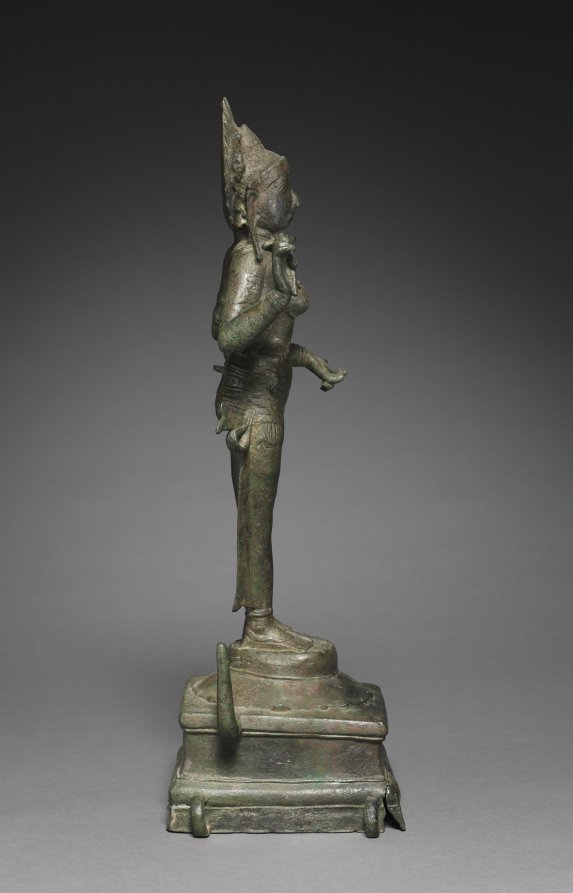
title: Kali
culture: South India, Tamil Nadu, Chola period (900-13th century)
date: 900s–1000s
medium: bronze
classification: Sculpture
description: The female aspect of Shiva, the goddess Parvati, has her own cycle of myths, and she herself emanates into different forms. Some branches of Hinduism consider the goddess to be the supreme creator divinity herself, who generated all the other gods, including Shiva. This bronze sculpture could have been affiliated with either branch. Kali is the wrathful form of the goddess generated in the midst of a battle with a demon that the gods failed to conquer. Kali was to drink his blood before any drop fell to ground, or else a new demon would instantly be generated. The demons are metaphors for human vices, such as egotistic pride and arrogance.